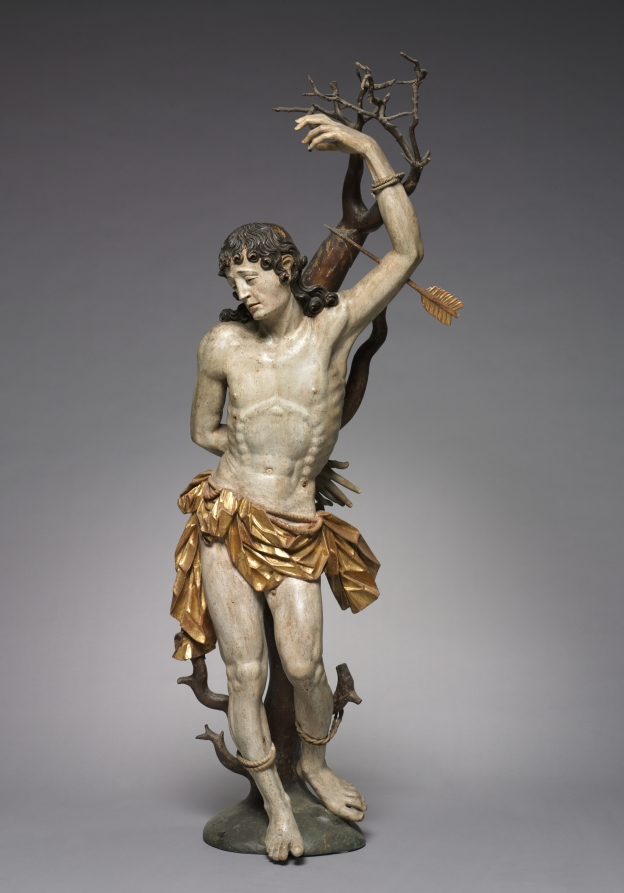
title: Saint Sebastian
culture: Germany, early 17th century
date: c. 1600–1620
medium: painted and gilded wood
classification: Sculpture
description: An early Christian saint and martyr, Sebastian was condemned to death by the Roman emperor Diocletian. Bound to a tree and shot with arrows, he survived—only later to be martyred by beating. This figure embodies the blend of stylistic influences that characterized German sculpture in the early 1600s. The graceful pose and anatomical naturalism of the legs indicate the influence of Italian Mannerism, while the crisp, stylized patterns of Sebastian’s hair and loincloth recall German Gothic works from the 1400s. The tree to which Sebastian is bound is an actual branch, shaped and refined to its present appearance.